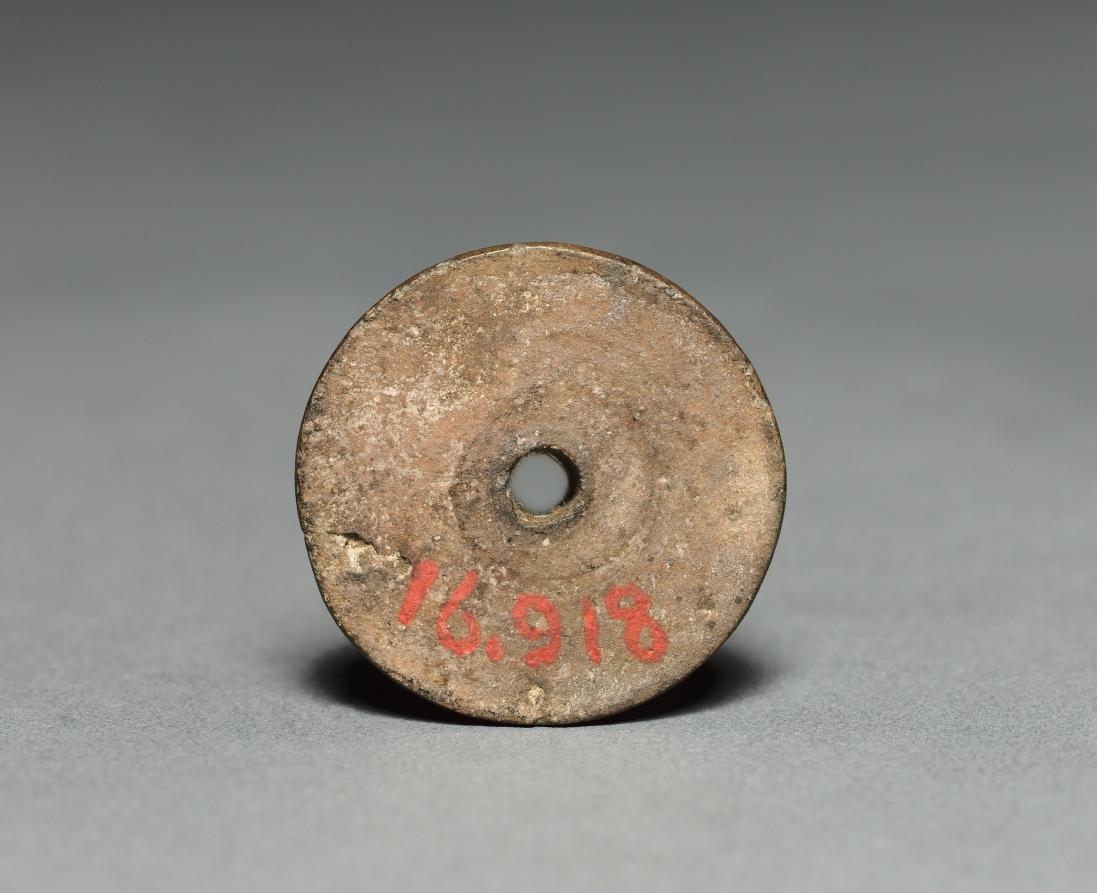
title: Spindle Whorl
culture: Mexico, 16th century or earlier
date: before 1521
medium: terracotta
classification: Ceramic